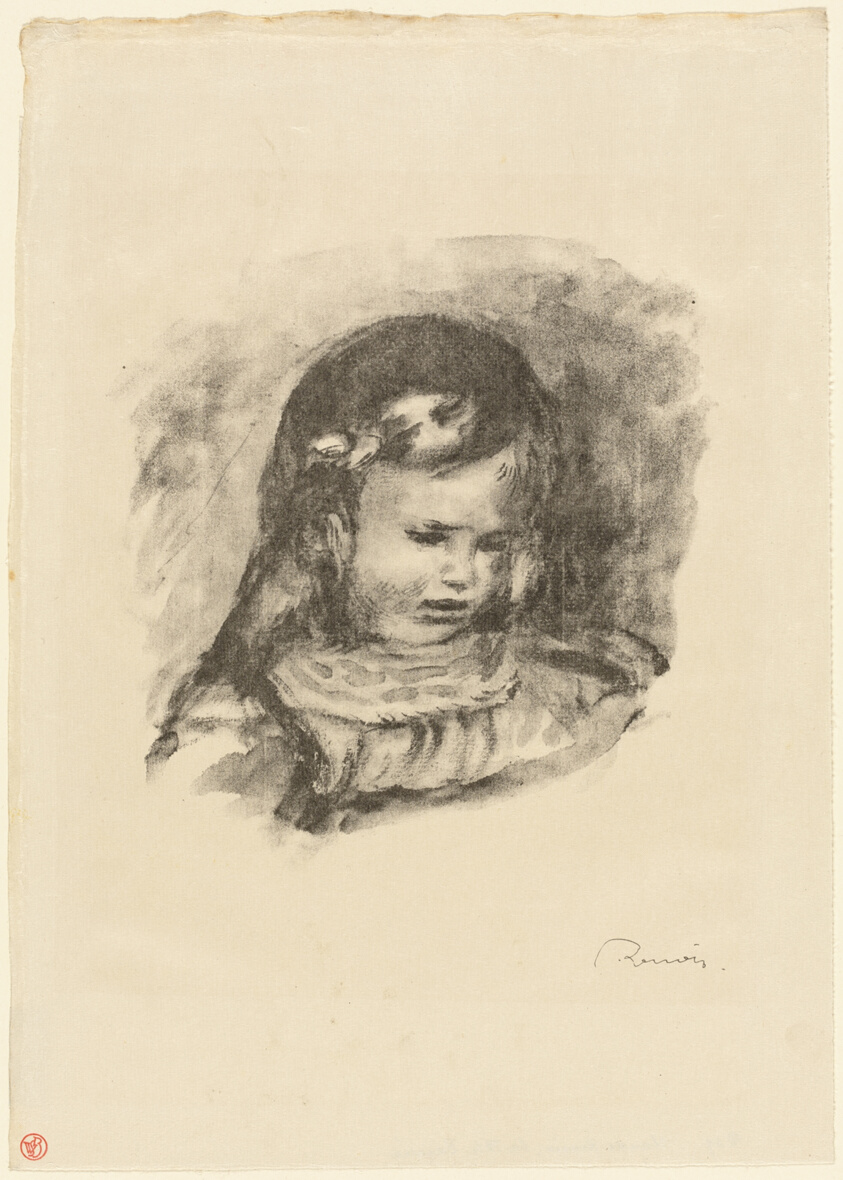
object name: Print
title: Claude Renoir, Head Lowered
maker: Pierre Auguste Renoir (French, 1841-1919); printed by Auguste Clot (French, 1858-1936); published by Ambroise Vollard (French, 1835-1939)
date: c. 1904, published 1919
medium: Lithograph in black on cream Japanese paper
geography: France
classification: lithograph; print; prints and drawing